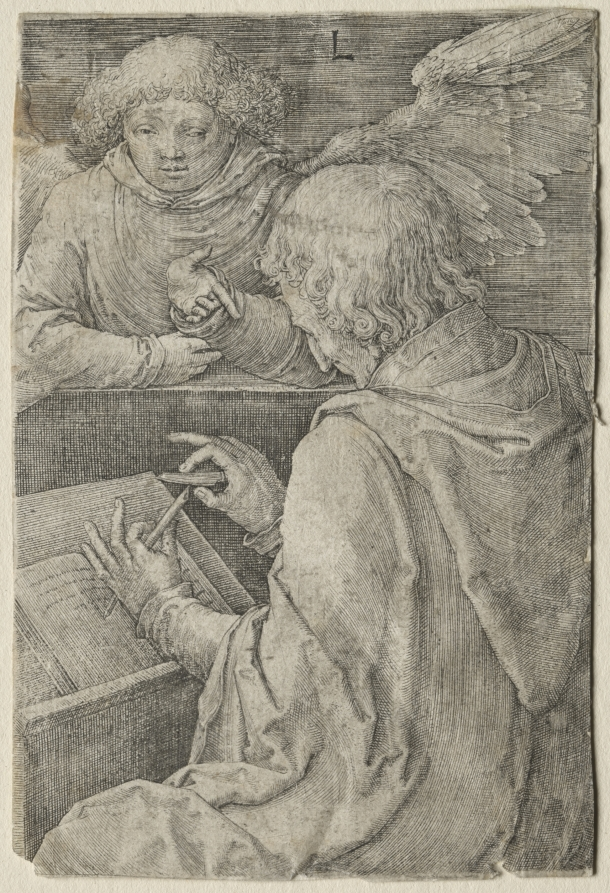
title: The Evangelists: St. Matthew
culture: Netherlands, 16th century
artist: Lucas van Leyden (Netherlandish, 1494–about 1533)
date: c. 1518–33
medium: engraving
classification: Print